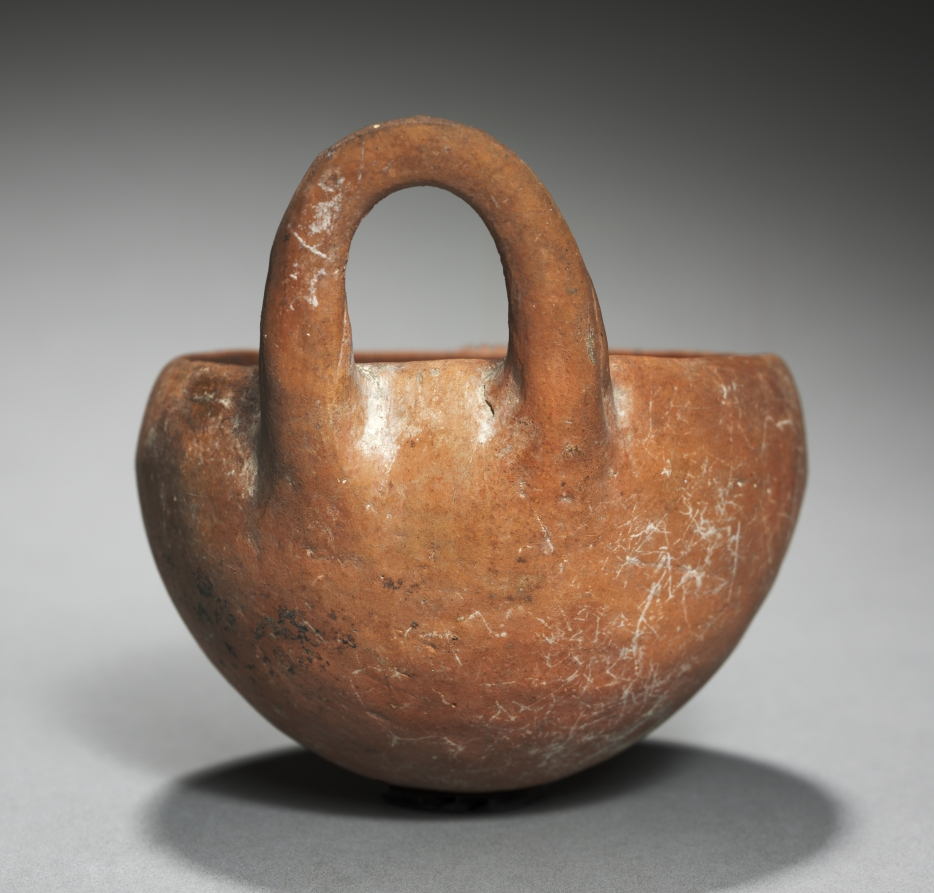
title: One-Handled Bowl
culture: Cyprus, early Cypriot III-middle Cypriot II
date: c. 2000–1725 BCE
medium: red ware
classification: Ceramic